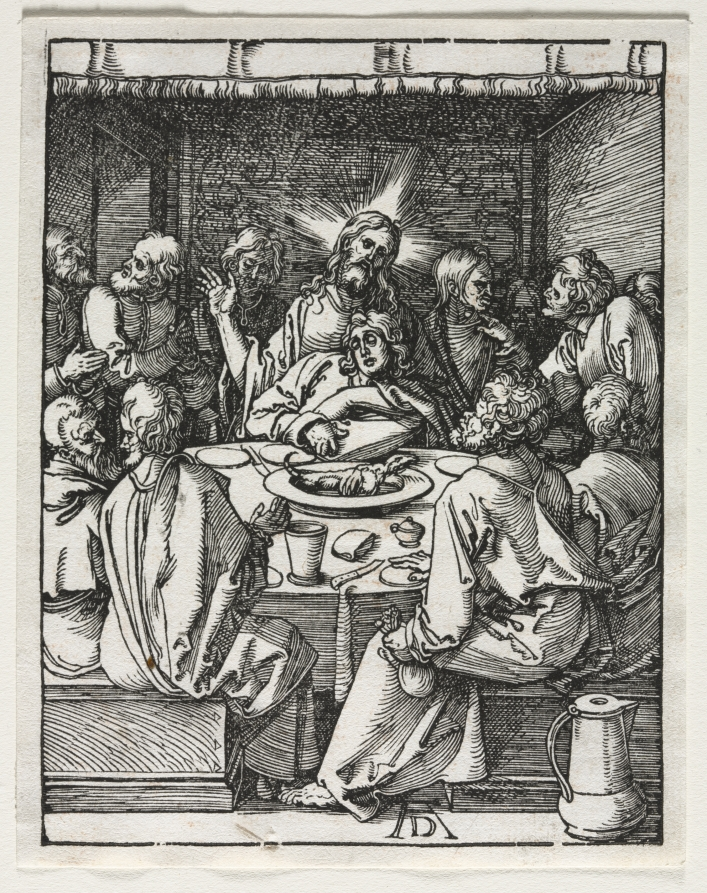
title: The Small Passion: The Last Supper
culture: Germany, late 15th-early 16th century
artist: Albrecht Dürer (German, 1471–1528)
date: c. 1509–10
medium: woodcut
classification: Print